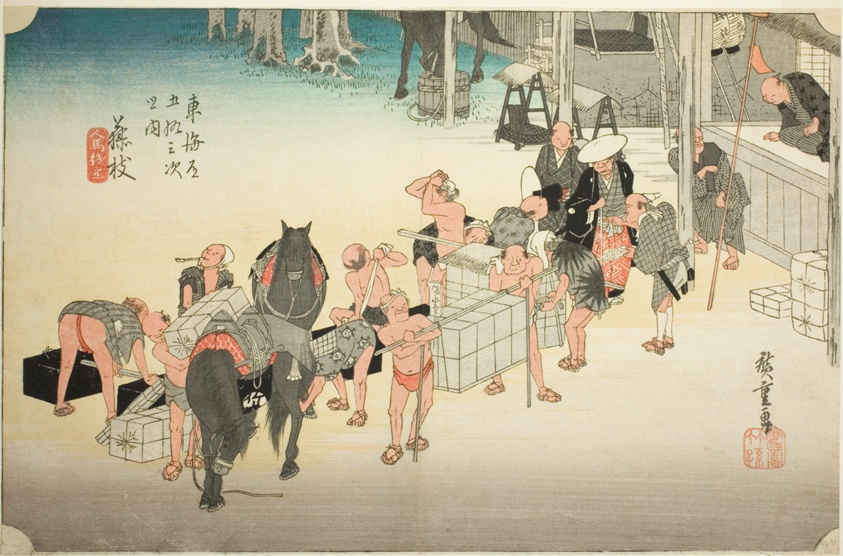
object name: Print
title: Fujieda: Changing Porters and Horses (Fujieda, jinba tsugitate), from the series "Fifty-three Stations of the Tokaido Road (Tokaido gojusan tsugi no uchi)," also known as the Hoeido Tokaido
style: Japanese (culture or style)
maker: Utagawa Hiroshige 歌川 広重; Japanese, 1797-1858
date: c. 1833/34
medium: Color woodblock print; oban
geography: Japan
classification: woodblock print; print; asian art